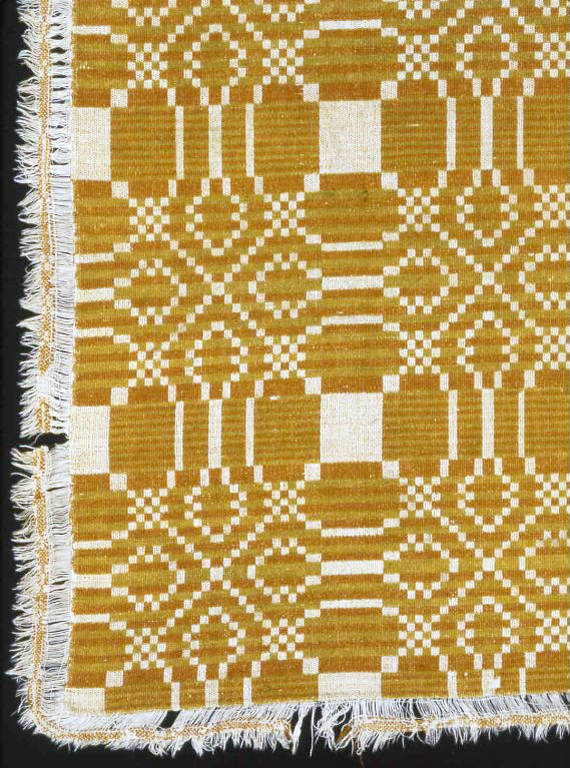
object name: Textile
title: Coverlet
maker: United States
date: 1820/25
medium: Cotton and wool, plain weave with supplementary patterning wefts ("summer and winter"); edged with cotton and wool, plain weave with gauze crossings and supplementary patterning wefts; main warp fringe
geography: United States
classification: textile; coverlet; weaving - coverlet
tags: coverlet